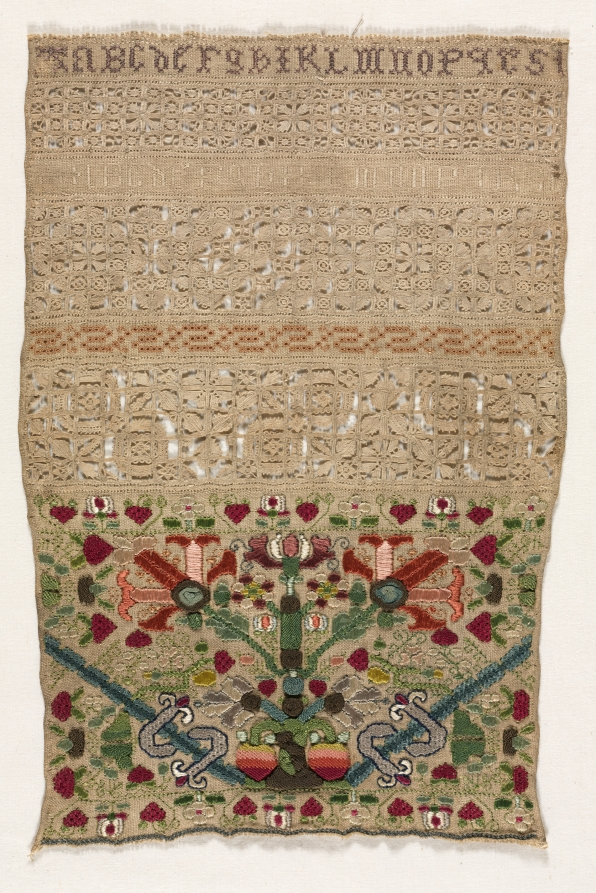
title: Sampler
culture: England, 17th century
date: 1600s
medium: embroidery; linen and silk on linen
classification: Sampler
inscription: below: "ABCdeFgHIKLMNOPQRSt."